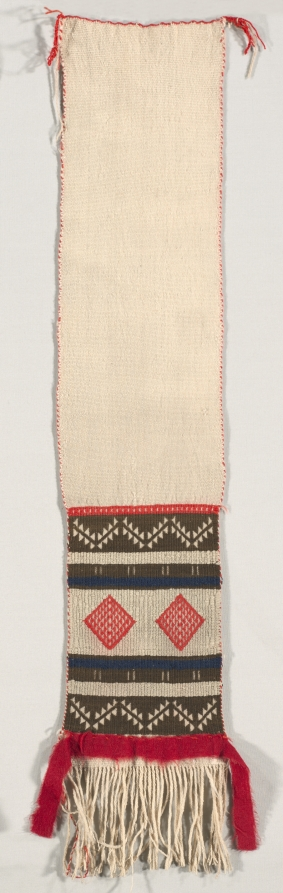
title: "Hopi Brocade" Style Dance Sash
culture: America, Native North American, Southwest, Pueblo (Hopi), Post-Contact, Late Classic Period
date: c. 1874–1885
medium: plain weave with supplementary weft wrap; wool (handspun, Germantown, and bayeta)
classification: Textile